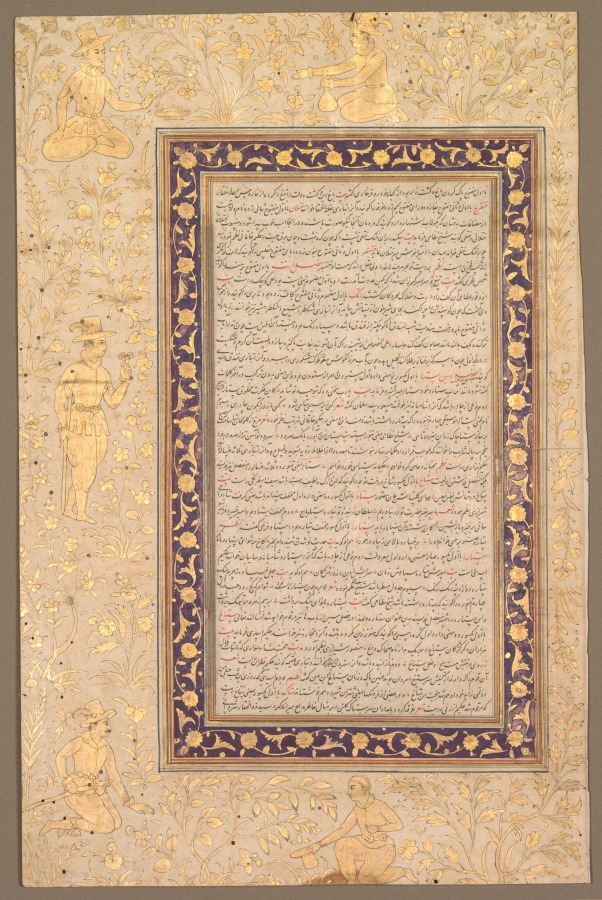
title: Circumcision ceremony for Akbar’s sons, painting 126 from an Akbar-nama (Book of Akbar) of Abu’l Fazl (Indian, 1551–1602)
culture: Mughal India, court of Akbar (reigned 1556–1605)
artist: attributed to Dharam Das (Indian, active c. 1580–1605)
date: c. 1602–3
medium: gum tempera, ink, and gold on paper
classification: Painting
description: This page is from a copy of the biography of Akbar that was completed not long before his death in 1605. It depicts him much younger, during the festivities held on October 22, 1573, in his newly built capital city of Fatehpur Sikri, near Agra, on the occasion of the circumcision ceremony for his three young sons. Dancers in Chaghatai Turkish dress perform as Akbar’s weight in gold is being distributed to the poor. Akbar wears a simple white tunic, or jama, stained at the armpits by aromatic musk. A curved dagger in a red velvet sheath is tucked into his golden sash, and he is crowned with a white crested turban.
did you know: An attendant strokes Akbar’s hunting falcon, perched on a glove.